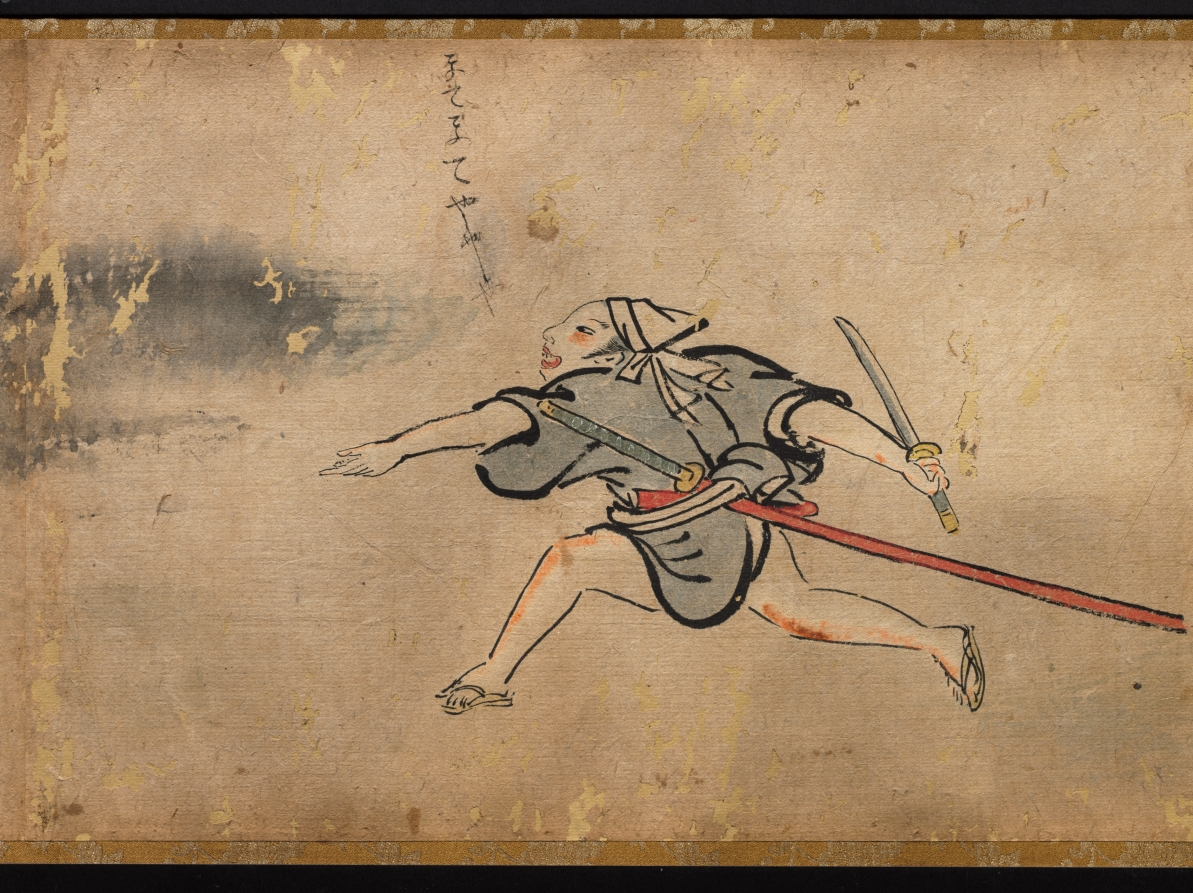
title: The Illustrated Tale of Oishi Hyōroku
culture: Japan, Edo period (1615–1868)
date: 1700s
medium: handscroll; ink and color on paper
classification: Painting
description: This incomplete handscroll illustrates part of the story of Oishi Hyoroku, a young man tasked with battling fox apparitions who were creating problems in his town. In other extant versions of the scroll, the story is set in the fall of 1624 in Kagoshima in southern Japan. Throughout the story, Hyoroku is tricked and terrified by the foxes that shift their shapes into a variety of monstrous phantoms. After repeated humiliations, he eventually captures two of the foxes. In this version, colloquial texts that function like text blurbs in comics appear throughout the scroll, but the main text is missing.